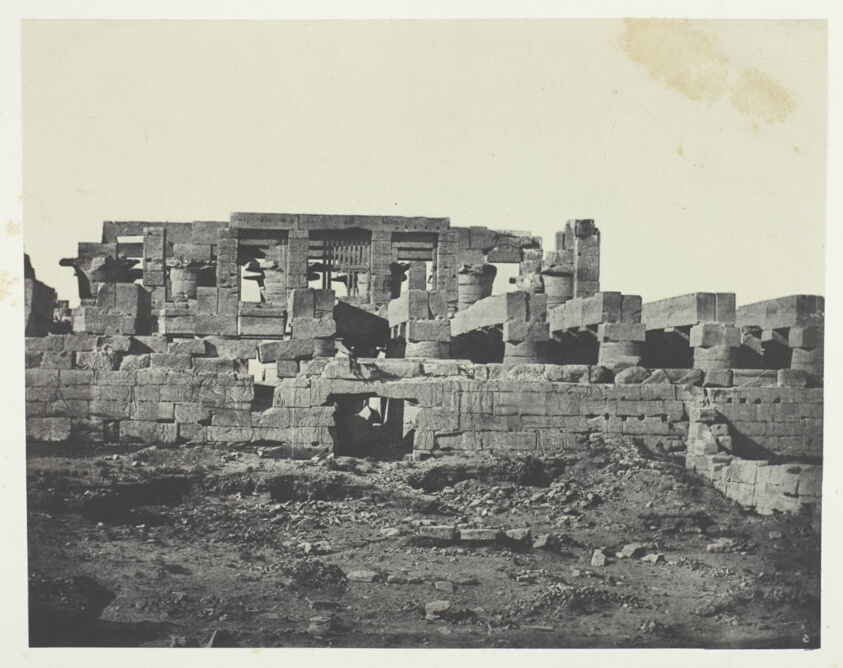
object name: Photograph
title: Palais de Karnak, Entrée Méridionale de la Salle Hypostyle; Thèbes, plate 33 from the album "Egypte, Nubie, Palestine et Syrie" (1852)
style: 19th century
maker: Maxime Du Camp (French, 1822–1894)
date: 1849/51, printed 1852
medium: Salted paper print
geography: France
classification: salted paper print; photographic process; photography; photograph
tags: Collected by Hugh Edwards, Egypte, Nubie, Palestine et Syrie